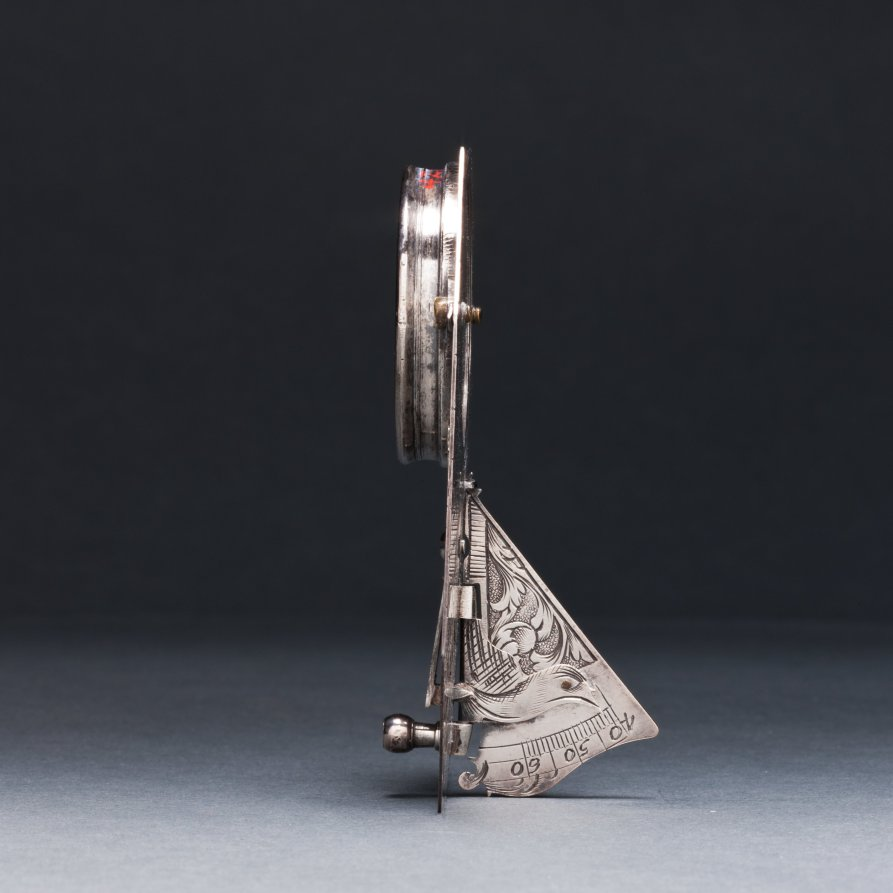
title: Butterfield Sundial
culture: France, 18th century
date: 1700s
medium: silver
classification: Silver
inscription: [Engraved signature above the compass in ribbon band]: "N. BION A Paris"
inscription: [Engraved on the face of the sundial]: “Pour 55° 4-5-6-7-8-9-10-11 50° IIII-V-VI-VII-VIII-IX-X-XI 45° 5-6-7-8-9-10-11 40° -VI-VII-VIII-IX-X-XI'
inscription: [Engraved on the other side]: "Pour 55° -8-7-6-5-4-3-2-1-0 50°-VIII-VII-VI-V-IIII-III-II-I 45°-8-7-6-5-4-3-2-1 40°-VII-VI-V-IIII-III-II-I"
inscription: [Engraved around the compass]: “NORD-OUEST-SUD-EST”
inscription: [Engraved on the back of the sundial]: “Turin 44 Milan 46 Paris 49 Lion 46 Metz 49 Rome 42 Liege 51 Naples 44 Namur 50 Gennes 44 Marseille 43 Grenoble 45 Bayonne 43 Bruxelle 51 Londres 52 Nantes 47 Vienne 48 Toulon 43 Tours 47 Lille 51”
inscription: [Engraved around the back of the compass]: “Venise 45 Strasbourg 49 Amsterdam 52 Hambourg 54 Varsovie 52 La Rochelle 46”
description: Butterfield-type sundials are characterized by their adjustable gnomons, metal flaps that cast a shadow on the dial’s face to indicate the hour, and geographical indices. This sundial has a scale adjustable between latitudes of 40° to 60° north. The latitudes of 26 European towns are engraved on its back for quick reference. With an intricately engraved silver face, it would have functioned as a fashionable traveler’s accessory.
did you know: Butterfield-style sundials were named after Micheal Butterfield, an English scientific and mathematical instrument maker who worked in Paris between 1674 and 1724.